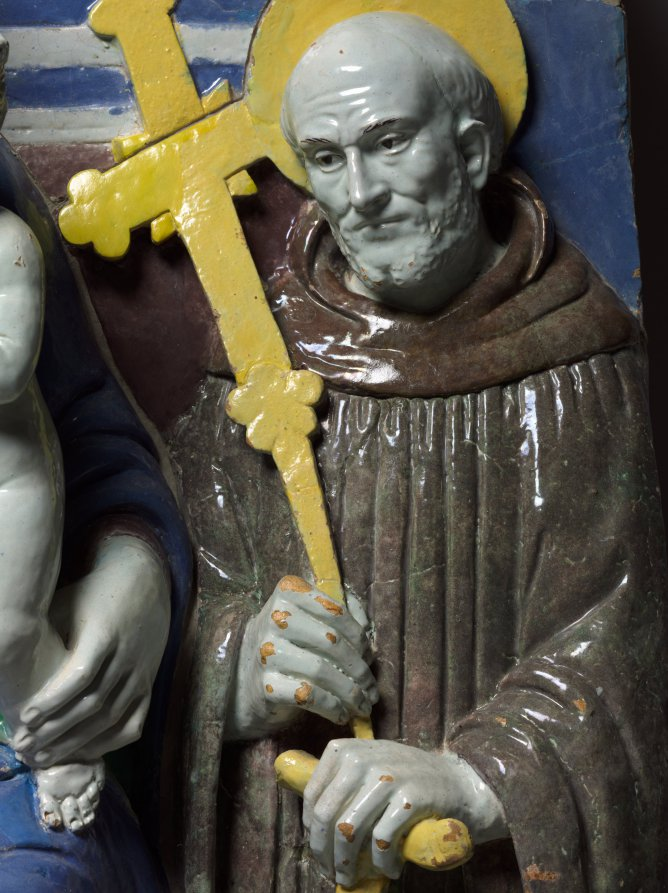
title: Virgin and Child Enthroned with Saints Francis and Giovanni Gualberto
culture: Italy, Florence, 16th century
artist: Benedetto Buglioni (Italian, 1461–1521)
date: c. 1510–20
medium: glazed terracotta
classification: Sculpture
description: The Madonna sits upon a throne with the Christ child standing on her knee. He is steadied by his mother, turning delicately to grasp her robe for support. On the left is Saint Francis, identified by his stigmata. On the right, Saint Giovanni Gualberto is identified by his monk's robe and distinctive processional cross. The brown robes of the saints, the purple of the Virgin's tunic, and the flesh tones of the figures contrast strongly against the bright blue background. In the semicircular sky behind the figures, three winged cherub heads emerge, representing a host of angels. Glazed terracotta is both durable and decorative and the gleaming white of this piece would have stood out in the darkness of a church. The medium was made popular by Renaissance artist Luca della Robbia and came into fashion as a substitute for expensive carved marble. A rounded arch frame embellished with fruit and flower garlands as well as egg-and-dart and cord moldings accompanied the work when it was acquired, but was later determined not to be original and removed. Buglioni's work bears the influence of the della Robbias, particularly in the simple color scheme. Buglioni likely worked in the studio of Luca's nephew, Andrea, where he would have learned the technique of glazing terracotta.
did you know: The unusual purple hue is particular to the artist.